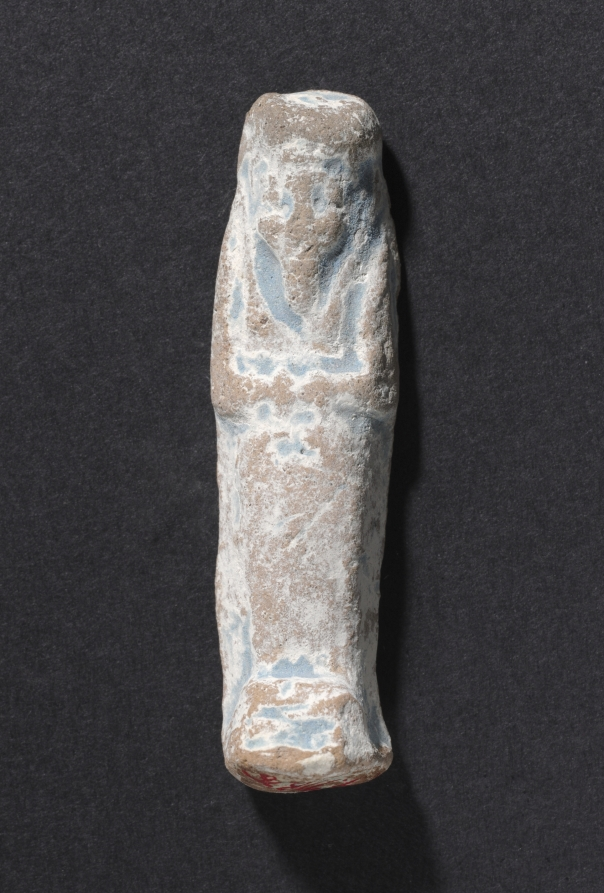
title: Shawabty of Ditamenpaankh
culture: Egypt, Late period (715–332 BCE), Dynasty 25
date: 715–656 BCE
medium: terracotta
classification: Funerary Equipment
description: High demand for shawabtys in the Late Period, a time when as many as 400 or more shawabtys were placed in the tomb with the deceased, gave rise to a specialized container for storing them: the shawabty box. This example is inscribed for the lady of the house, Ditamenpaankh, and was probably one of a pair originally made for her. The single-masted boat on the box's lid is perhaps an allusion to the pilgrimage of the deceased to the holy city of Abydos, the cult city of Osiris, king of the dead. The shawabtys inside are crude, mass-produced examples cast in an open mold. Made of terracotta, their blue paint imitates more costly shawabtys made of faience. As for the shawabty spell, it has been removed from its traditional location on the shawabty's front and relocated onto the sides of box, where it needed only to be written once, thus expediting production.